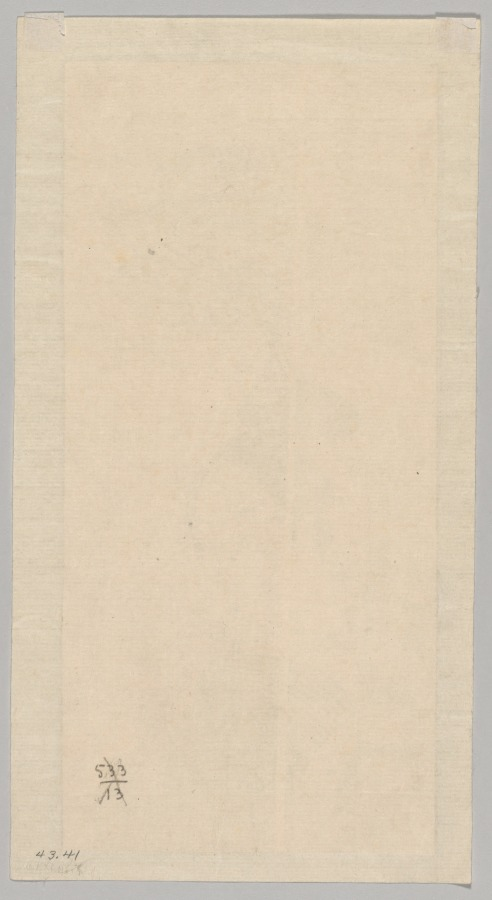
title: Komurasaki of the Miuraya and Shirai Gonpachi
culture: Japan, Meiji period (1868–1912) to Shōwa period (1926–89)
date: c. 1868–1943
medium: color woodblock print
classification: Print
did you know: This unsigned work shows two actors portraying the "based on real events" story of ill-fated lovers. It may have been inspired by the work of print designer Kitagawa Utamaro on the same theme.